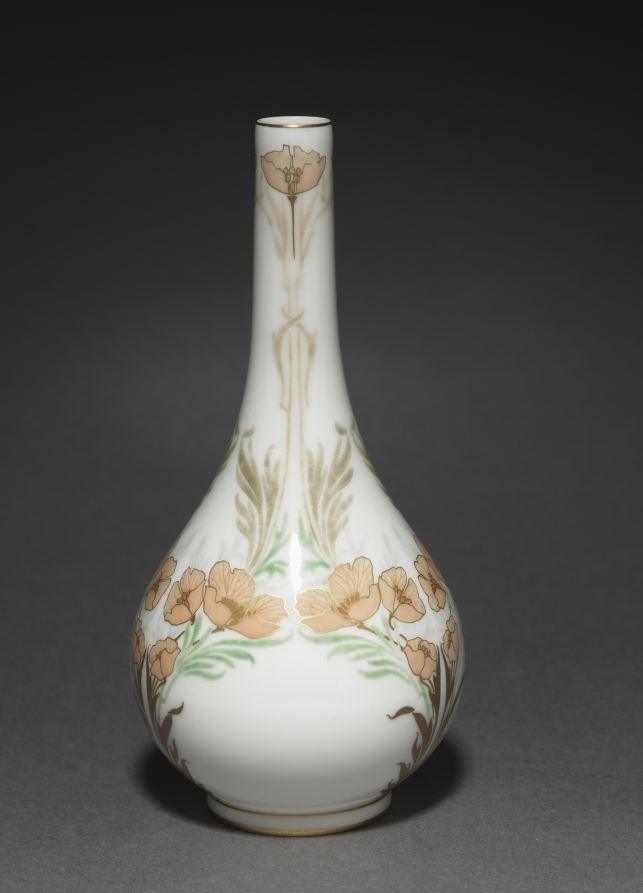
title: Vase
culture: France, Sèvres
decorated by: Jean-Charles-Hippolyte-Abel Leger (French)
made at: Sèvres Porcelain Factory (French, est. 1756)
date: 1905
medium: porcelain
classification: Ceramic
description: The shape of this vase, with its globular body and long neck, is influenced by the form of Chinese porcelain vases intended to hold singular flowers or branches. Delicate pink poppies with green and gold leaves decorate the vase.